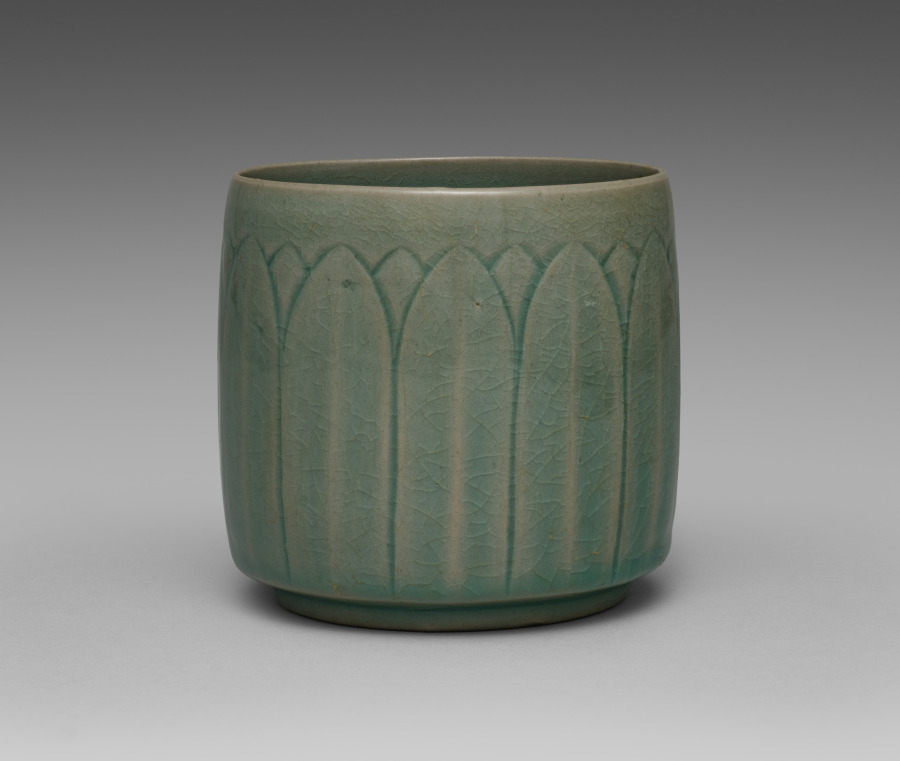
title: Celadon Cup with Molded Lotus Petal Design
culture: Korea, Goryeo dynasty (918–1392)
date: 1100s–1200s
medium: Celadon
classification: Ceramic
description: Celadon wares intended for everyday use—such as this dish—were among the most common burial objects placed in tombs during the Goryeo period (918–1392). Furnishing tombs with elaborate assemblages of objects was believed to honor the deceased and provide comfort in the afterlife. This dish, featuring the lotus petal motif, was likely a cherished possession that accompanied its owner to their final resting place.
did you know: The outer wall of this teacup is decorated with the image of lotus flower petal, a symbol of purity and salvation.